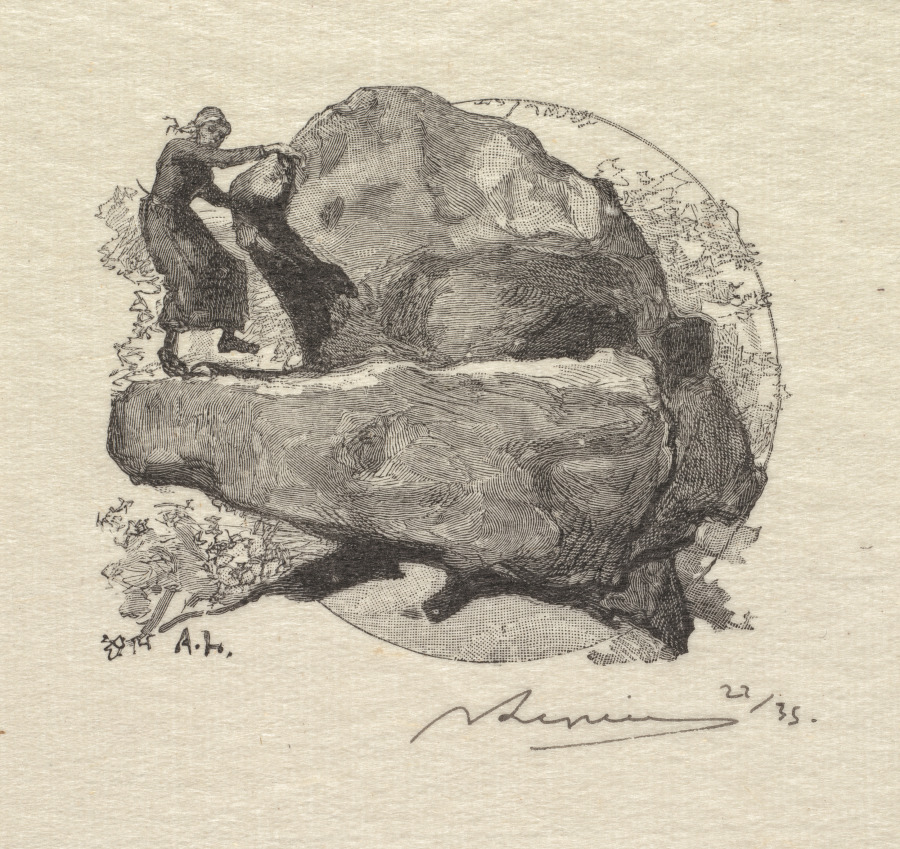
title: Fontainebleau Forest: The Trembling Rock (La Forêt de Fontainebleau: La roche qui tremble)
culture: France, 19th century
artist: Auguste Louis Lepère (French, 1849–1918)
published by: A. Desmoulins, Published in Revue Illustrée, 1887–90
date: 1890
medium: wood engraving from bound volume of 34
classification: Bound Volume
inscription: On block, lower left: E.14 A.L.; below image, lower right, in black ink: ALepère 22/35; on window mat, lower right, in graphite: La roche qui tremble